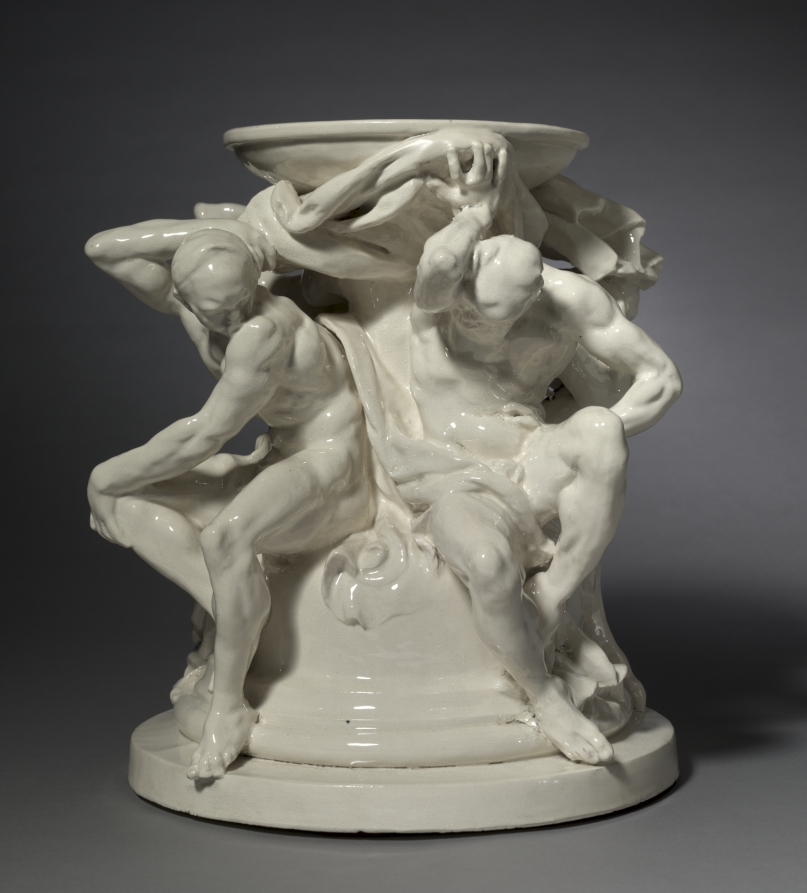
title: Titans, Support for a Vase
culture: France, made at Choisy le Roi, 19th century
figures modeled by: Auguste Rodin (French, 1840–1917)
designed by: probably by Albert-Ernest Carrier-Belleuse (French, 1824–1887)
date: c. 1877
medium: glazed earthenware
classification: Ceramic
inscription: incised near bottom of plinth: "A. CARRIERE-BELLEUSE."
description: During his lifetime and afterward, Auguste Rodin was viewed as the modern equivalent to Michelangelo. Rodin worked against the prevailing styles of his time and may have seen parallels between his own struggles and Michelangelo’s reputation in the 1800s as a suffering genius. In 1875 Rodin went to Italy to study Renaissance art, specifically works by Michelangelo. The twisting titans (giants) on this pedestal base are directly inspired by Michelangelo’s ignudi (male nudes) on the Sistine Chapel ceiling. Rodin did not directly copy the poses but translated the energy and movement of the nudes into new, three-dimensional forms.